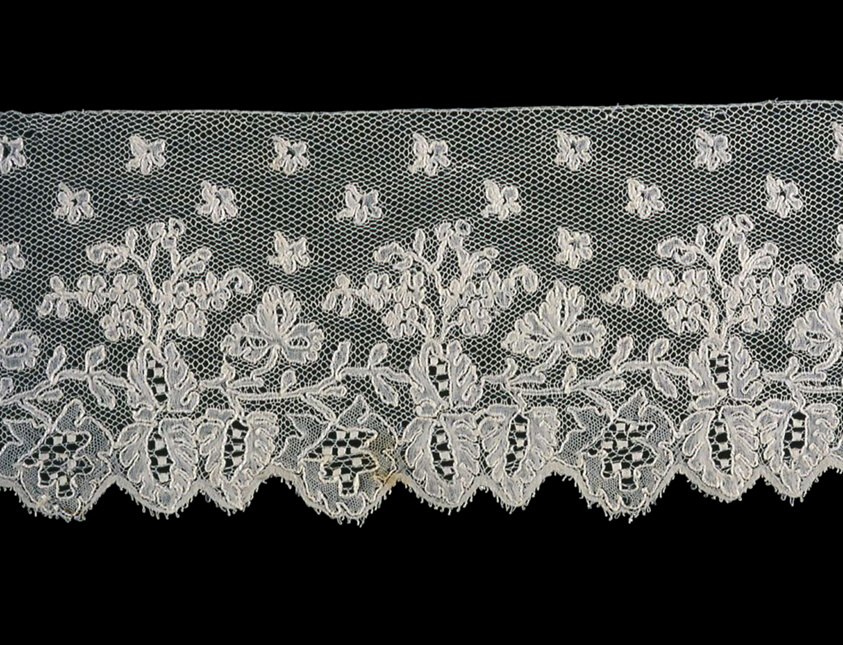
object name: Textile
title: Border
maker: Belgium, Flanders, Mechlin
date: c. 1820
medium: Cotton and linen, bobbin straight lace of a type known as "Mechlin" with a Mechlin mesh ground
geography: Flanders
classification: textile; lace - bobbin; lace